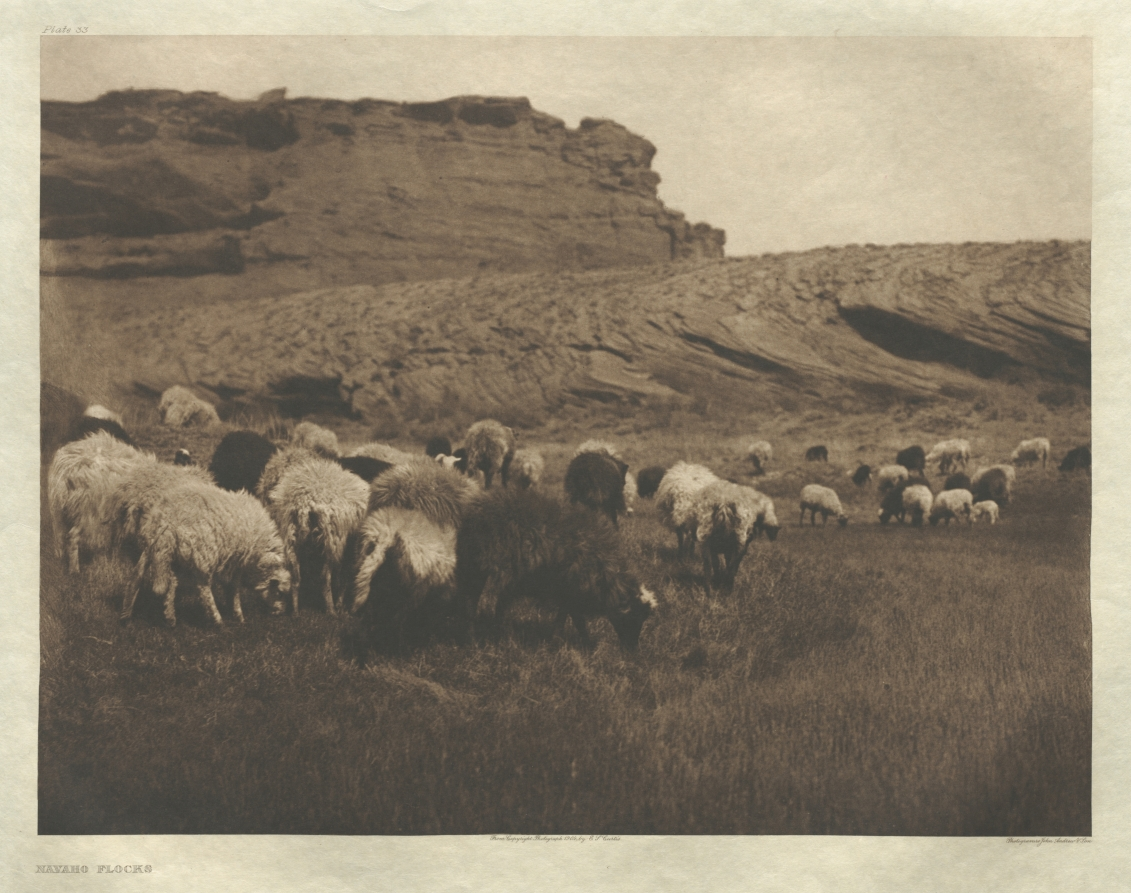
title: Portfolio I, Plate 33: Navaho Flocks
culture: America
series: The North American Indian: being a series of Portfolios picturing and describing the Indians of the United States, the Dominion of Canada, and Alaska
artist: Edward S. Curtis (American, 1868–1952)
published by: The University Press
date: 1904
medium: photogravure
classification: Portfolio